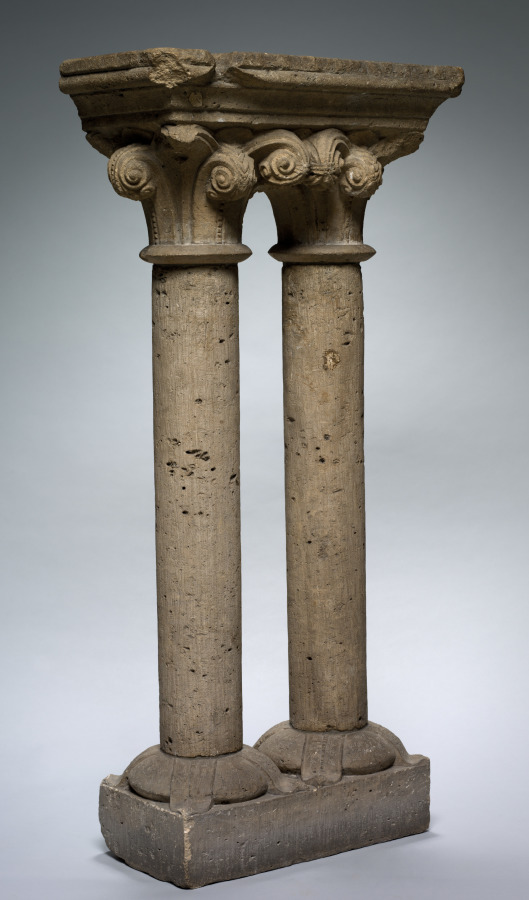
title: Capitals and Columns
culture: France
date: 1200s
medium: stone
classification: Sculpture